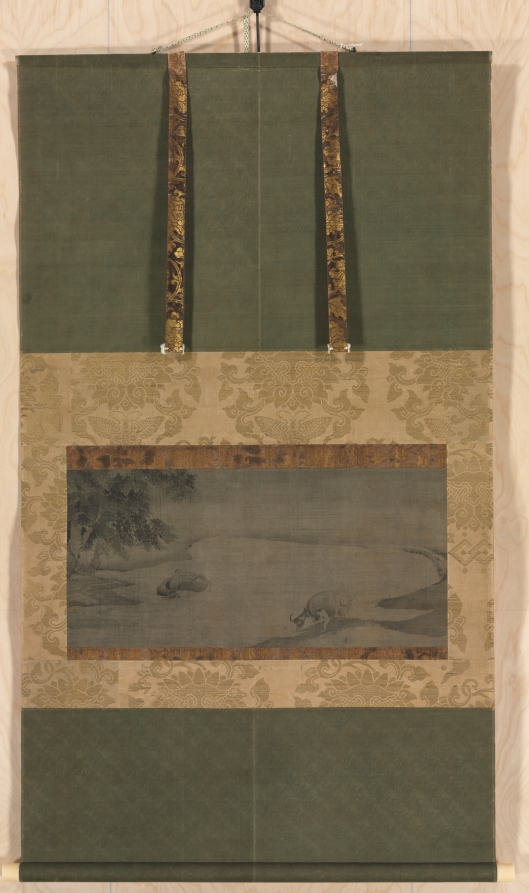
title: Water Buffalo and Herdboys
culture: China, Yuan dynasty (1271-1368)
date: late 1200s–early 1300s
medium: Hanging scroll; ink on silk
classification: Painting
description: In southern China, farmers use water buffalos to help plow their fields, which children often tend. In Buddhist teachings, the subject of herding or taming an ox was used to illustrate the 10 steps to enlightenment, or spiritual awakening. A single image may be read as a metaphorical representation of the Chan process of attaining enlightenment, the difficulty of which was likened to that of finding a strayed buffalo. Here, a buffalo is watered by a boy, another takes a bath in the pond. Chan paintings introduced to Japan were often remounted to fit them into niches for display (tokonoma), which explains the painting’s current format.